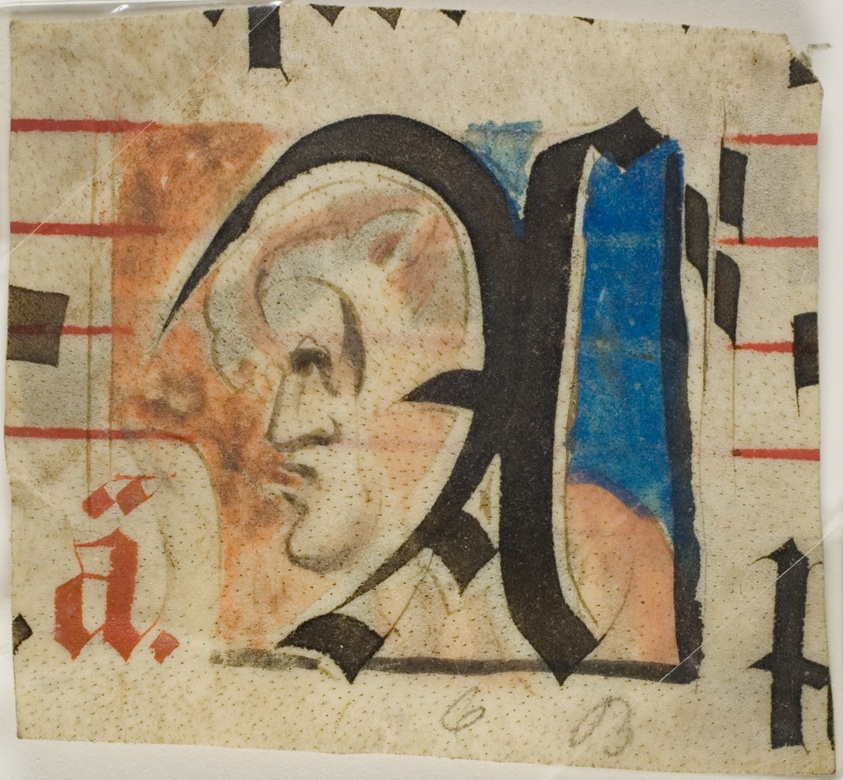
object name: Drawing and Watercolor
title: Decorated Initial with Grotesque in Profile from a Choir Book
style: medieval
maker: European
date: early 15th century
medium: Manuscript cutting in tempera, with inscriptions in black and red inks, on vellum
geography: Europe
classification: drawings (visual works); manuscript; prints and drawing